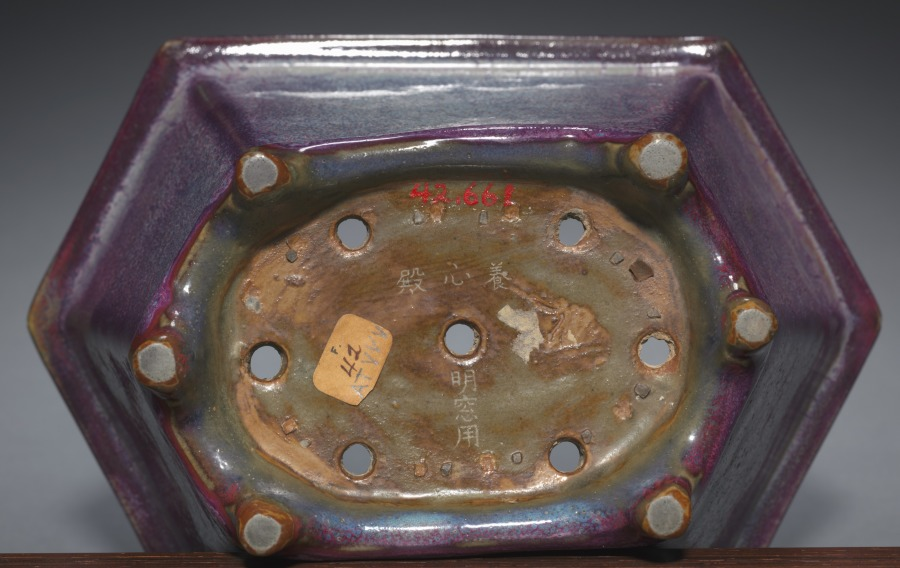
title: Hexagonal Flower Pot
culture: China, Henan province, Yuxian, Juntai, Ming dynasty (1368-1644)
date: 1300s–1400s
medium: porcelaneous stoneware, numbered Jun ware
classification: Ceramic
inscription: 八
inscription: 明窓用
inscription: 養心殿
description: This deep hexagonal flowerpot, one of a pair in the collection, is numbered "8" and bears additional inscriptions to indicate specifically the location of its usage within the palace: "for use in the Study of Illumination (Mingchuang yong)" within the "Hall of Cultivating the Mind (Yangxin Dian)" of the Forbidden City. The inscriptions seem to suggest the Qing imperial provenance of this flower pot.